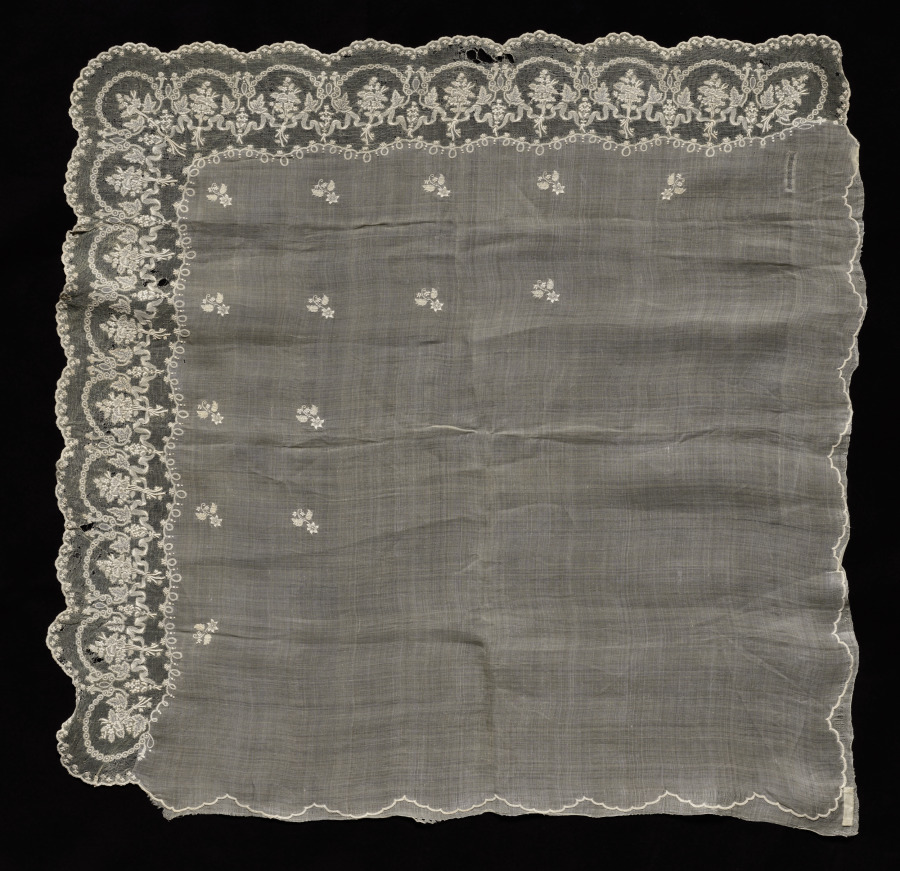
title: Blouse in four pieces (blouse)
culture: Philippines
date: 1800s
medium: Plain weave piña; needle lace (drawnwork) and white cotton embroidery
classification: Embroidery